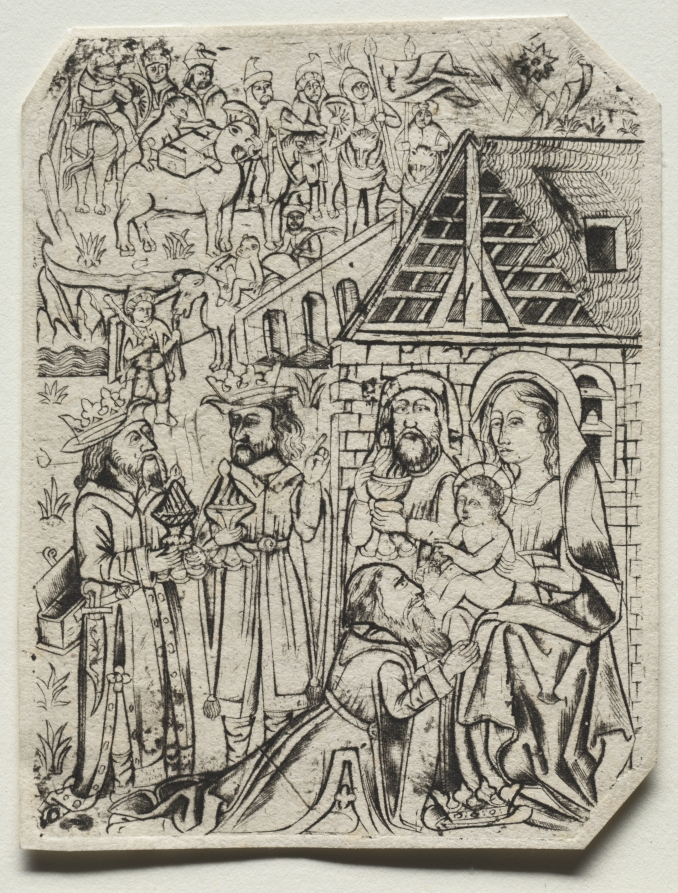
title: Adoration of the Magi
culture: Germany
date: 1400s(?)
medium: engraving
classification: Print